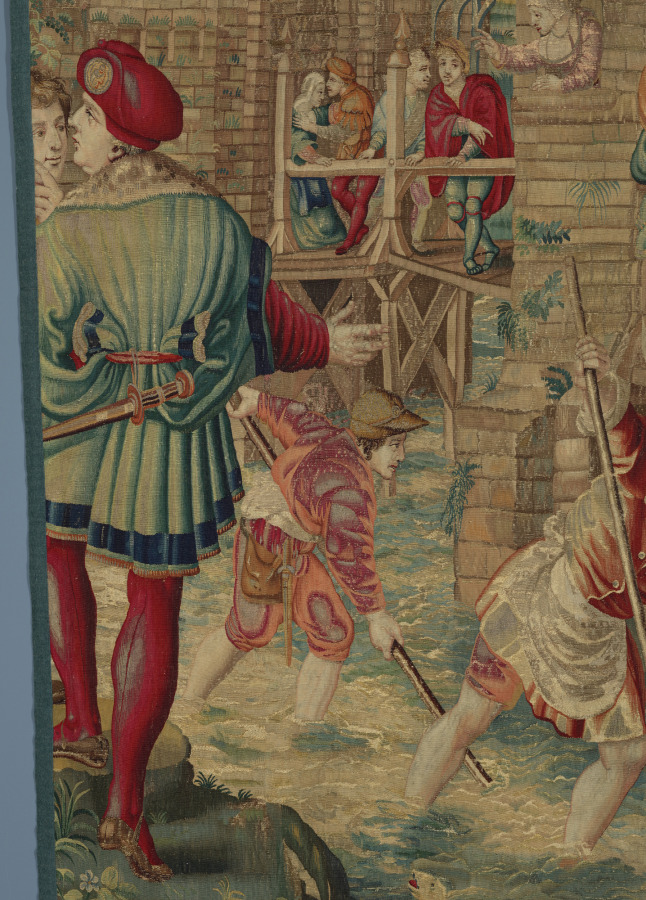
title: Spring: Fishing Scene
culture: France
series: Four Seasons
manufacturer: possibly by Gobelins Manufactory (France, Paris, est. 1662)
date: designed c. 1535, woven mid- to late 1600s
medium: Wool, silk, and gold filé: tapestry weave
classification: Tapestry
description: In this springtime scene, two fishermen wade in a river, dragging a net suspended between two poles. A noble couple on a bridge gestures toward other fishermen, who occupy the other side of this scene in other extant examples of this tapestry with a larger picture plane. In the background, townspeople walk on bridges that lead to the gateway of a town with brick walls and portals. In the far distance, farmers till the soil to sow new seeds, another typical activity associated with spring. The trees on the hills are just beginning to sprout new buds.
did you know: Spring was considered to be a season of courtship and romance; perhaps the gentleman on the bridge in the red cap is trying to catch the attention of the lady next to him.